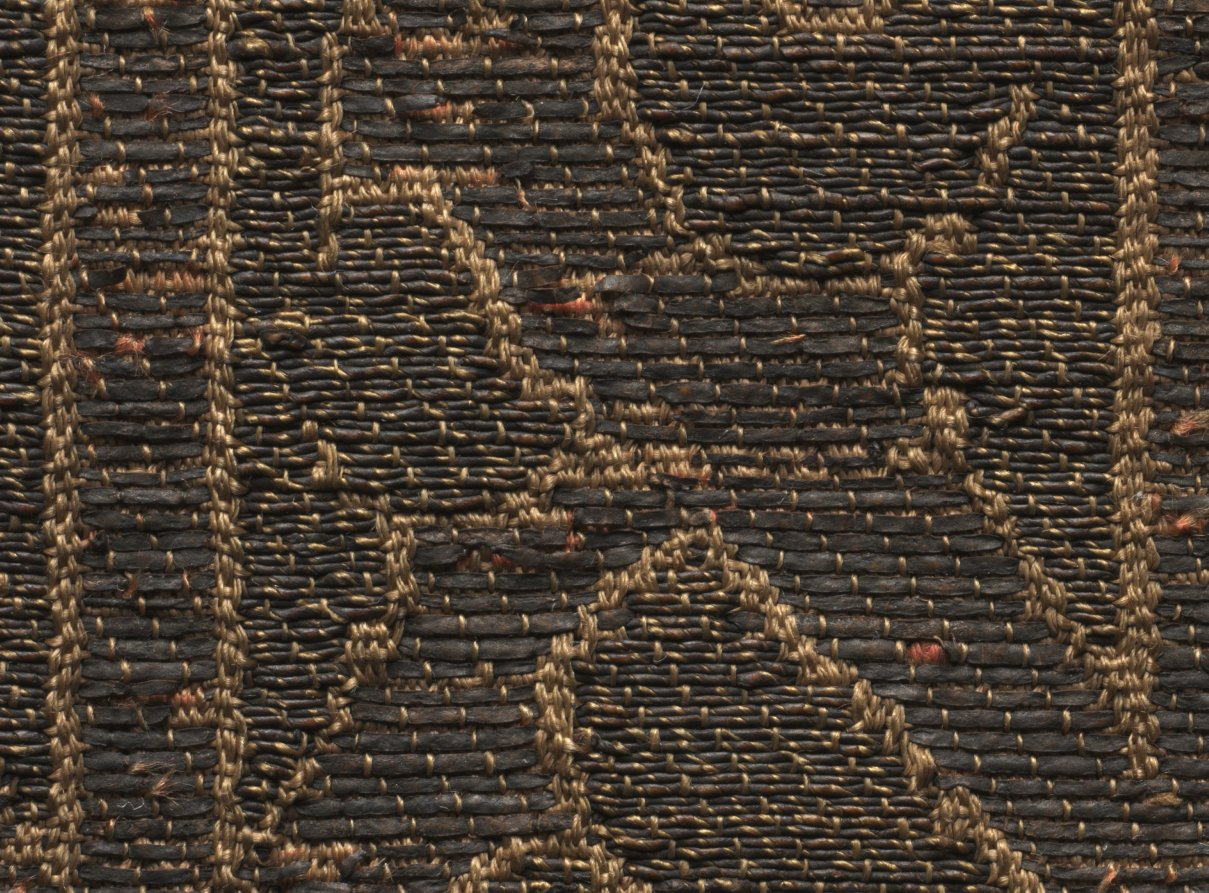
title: Cloth of gold with felines and eagles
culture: Northeast Iran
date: 1225–75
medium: Silk and gold thread: lampas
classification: Textile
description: Mongol taste for luxury was equated with gold, symbol of imperial authority, power, and legitimacy. This splendid cloth of gold-exceptionally large and luxurious-may have enriched the interior of a palace or a majestic tent. The golden pattern, although tarnished on the faded red silk ground, features scalloped medallions with felines whose long tails terminate in dragons’ heads amid elegant floral vines. Double-headed eagles form interstitial motifs on the floral ground. A radiant gold-on-gold band of pseudo-Arabic script enriches the top, woven with gold strips wrapped around a silk core on a ground of flat strips of gold, immediately beneath the pattern testing area.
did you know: Mongol cloths of gold, called nasji, incorporate Iranian, Central Asian, and Chinese features, reflecting the effects of gift exchanges and international commerce.